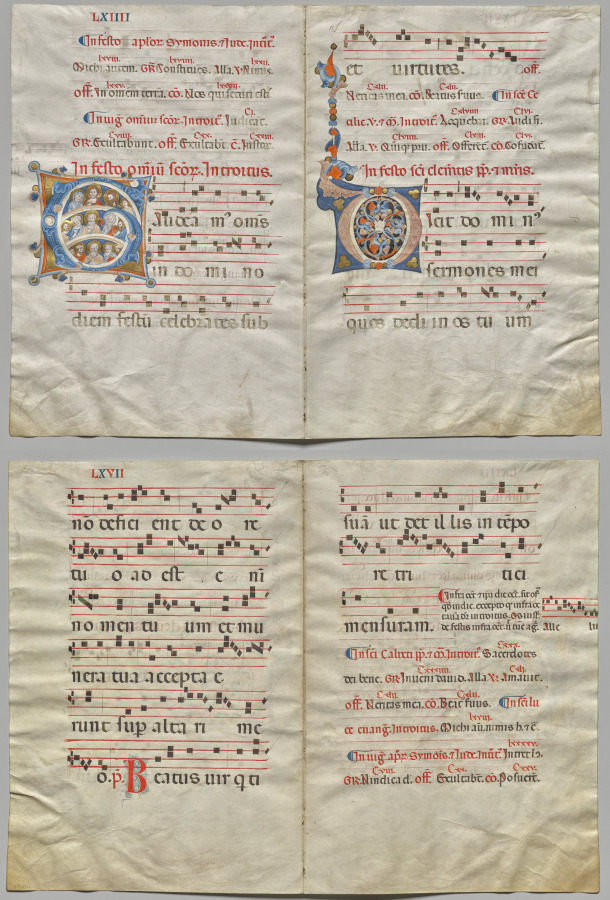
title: Bifolio from a Gradual: Initial (G) with Christ, the Virgin, and Apostles and Initial (O) (recto); Music and Text (verso)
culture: Italy, Siena(?)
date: c. 1300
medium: Ink, tempera, and gold on vellum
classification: Manuscript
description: The large decorated initial G introduces the text, Gaudeamus omnes in Domino (Let us rejoice in the Lord). It is the beginning of the opening prayer, or introit, of the Mass for the Feast of All Saints (November 1). The figures within the initial include Christ, the Virgin Mary, and various saints.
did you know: Words written in red ink, called rubrics, indicate titles and chapter headings that are not part of a manuscript’s main text.